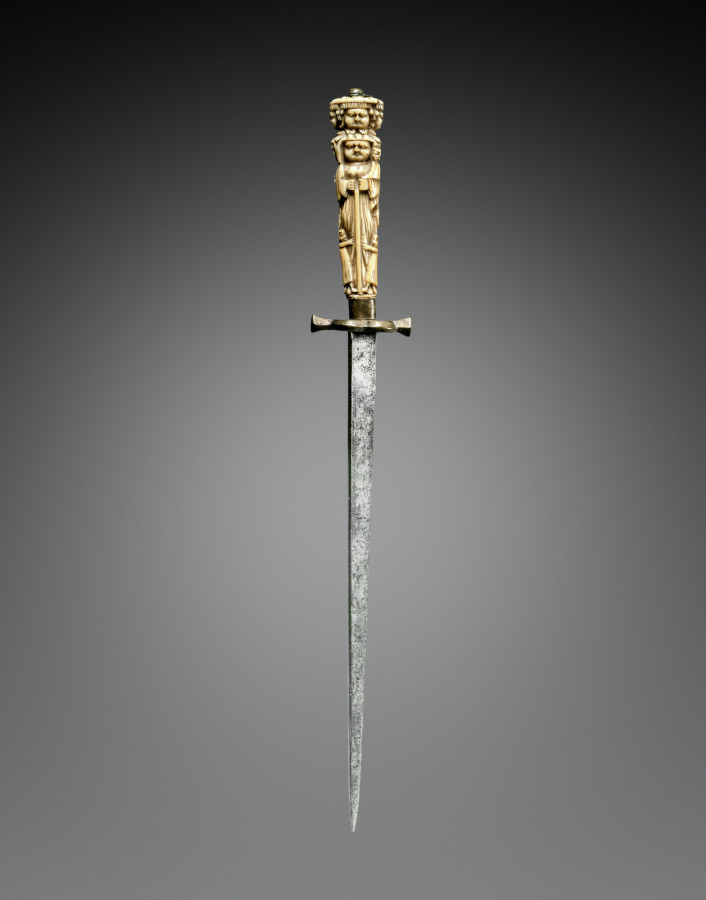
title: Stiletto with Grip Fashioned as Figures of Charity, Justice, and Hope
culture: Italy, 17th century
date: c. 1650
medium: steel, brass, ivory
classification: Arms and Armor